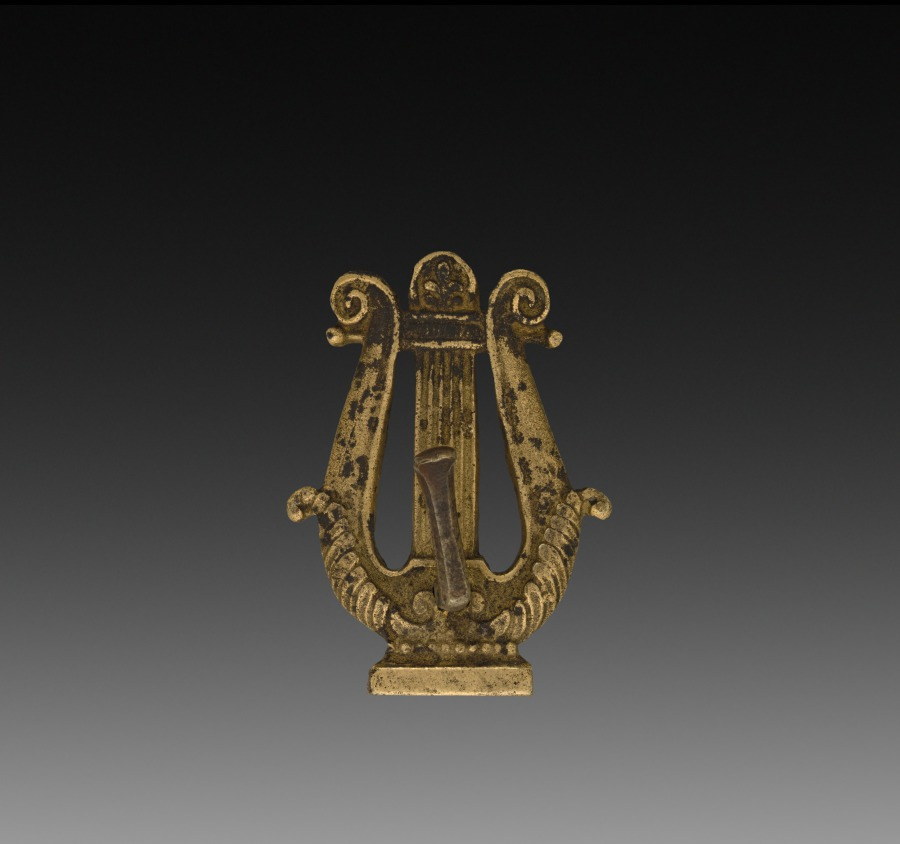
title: Ornamental Hook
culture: France, early 19th century, Empire Style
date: early 19th century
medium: gilt bronze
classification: Metalwork